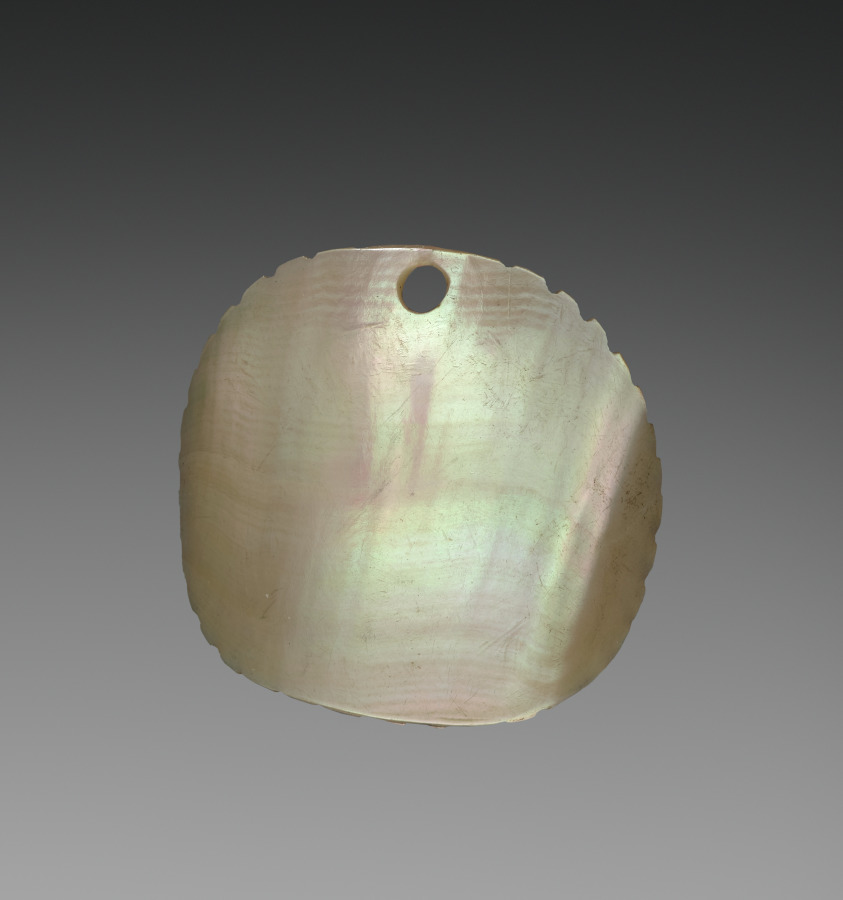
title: Earring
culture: probably Malacian or South Sea Islands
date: before 1916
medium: mother-of-pearl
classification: Jewelry